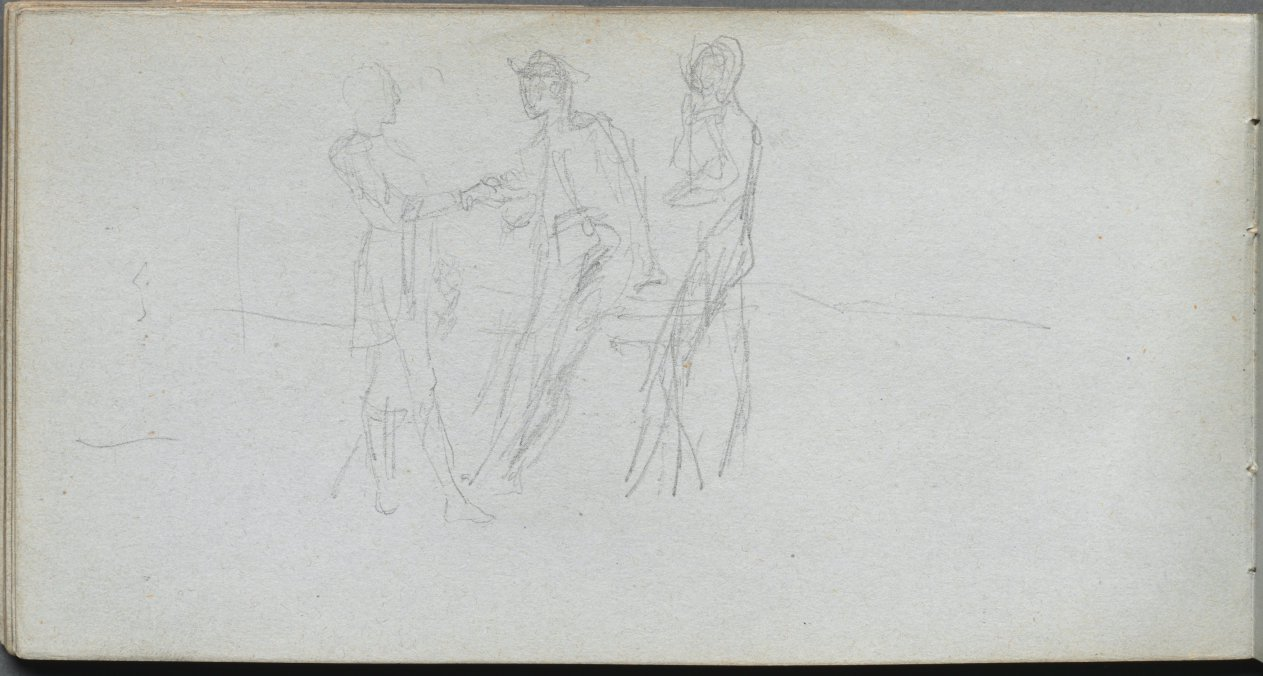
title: Sketchbook, page 42: Three Figures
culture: France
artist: Ernest Meissonier (French, 1815–1891)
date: c. 1860s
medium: graphite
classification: Bound Volume